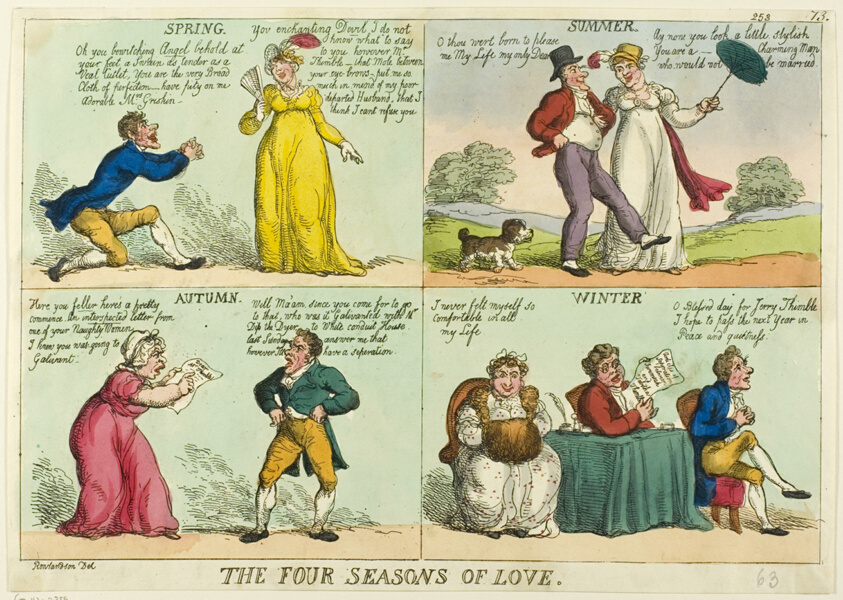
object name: Print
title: The Four Seasons of Love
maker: Thomas Rowlandson (English, 1756-1827); published by Thomas Tegg (English, 1776-1845)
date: published September 15, 1814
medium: Hand-colored etching on ivory wove paper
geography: England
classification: etching; print; prints and drawing